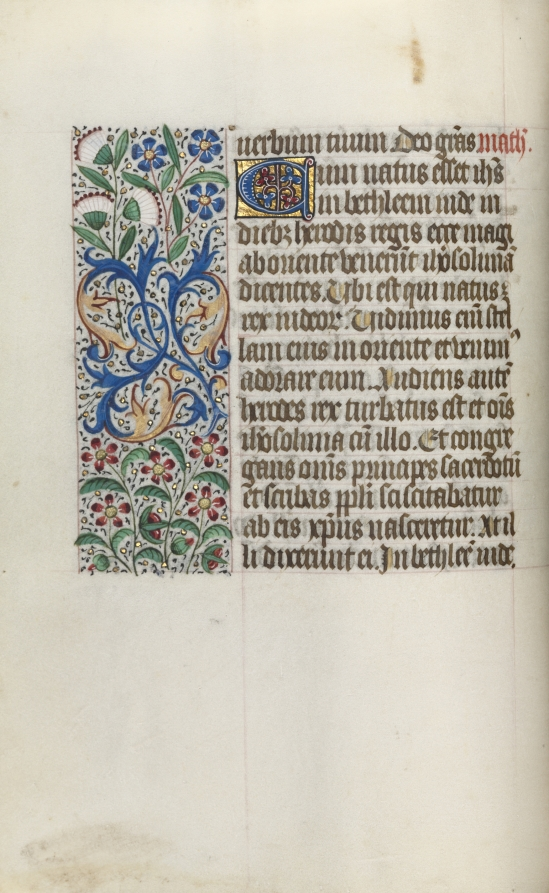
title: Book of Hours (Use of Rouen): fol. 16v, Opening of the Gospel of Mathew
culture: France, Rouen, 15th century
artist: Master of the Geneva Latini (French, active Rouen, 1460–80)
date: c. 1470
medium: ink, tempera, and gold on vellum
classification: Bound Volume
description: In the late 1400s and early 1500s Rouen was an established and important center of book production. The city’s cathedral had a wealthy chapter that spent large sums of money to commission books and to maintain its extensive library. The stationers and booksellers would have likely been concentrated in or near the cathedral precinct. This artist, named after a manuscript now in Geneva, was Rouen’s principal illuminator during the second half of the 1400s.